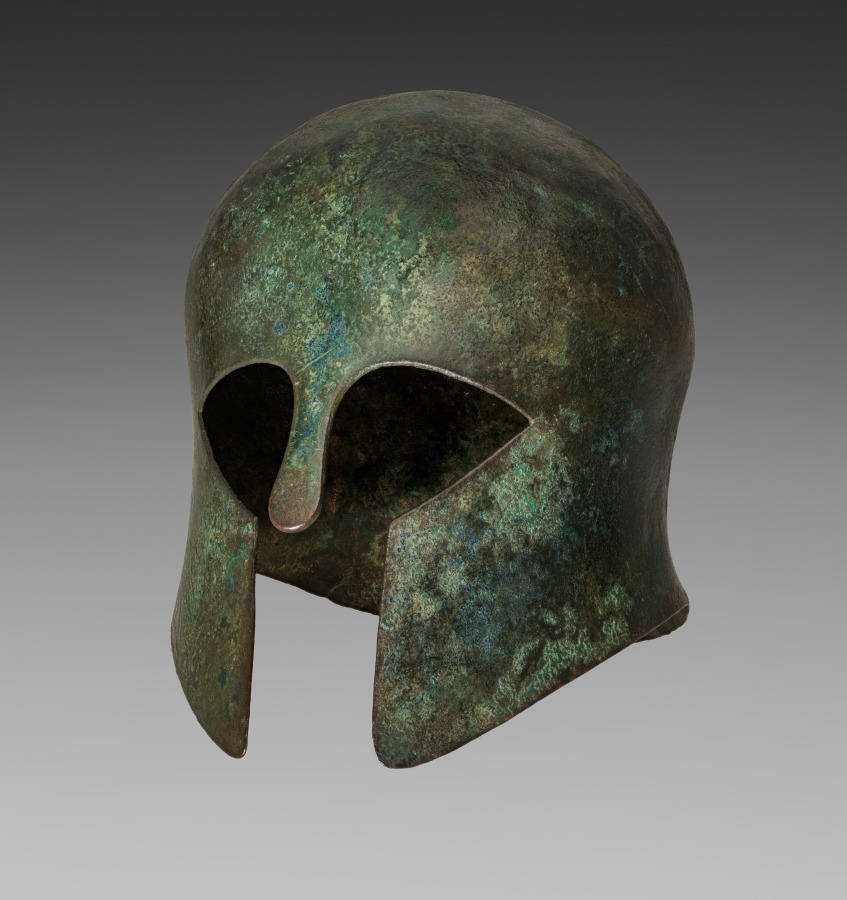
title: Corinthian Helmet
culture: Greek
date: c. 625–550 BCE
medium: Bronze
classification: Arms and Armor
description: This remarkably well-preserved bronze helmet belongs to an iconic type known as Corinthian yet produced far beyond the city of Corinth. Designed for use by hoplite warriors, who fought with spears and shields in shoulder-to-shoulder (phalanx) formation, such helmets provide maximum protection but limited vision, hearing, and movement. Probably first cast and then hammered into its final shape, the helmet features both gentle curves and sharp angles, evoking the head and face that it protected. Similar helmets appear frequently on warriors shown in ancient art, though often with crests of horsehair or other organic materials that no longer survive.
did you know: A small hole above the rear neckline, now repaired, may reflect a fatal blow.